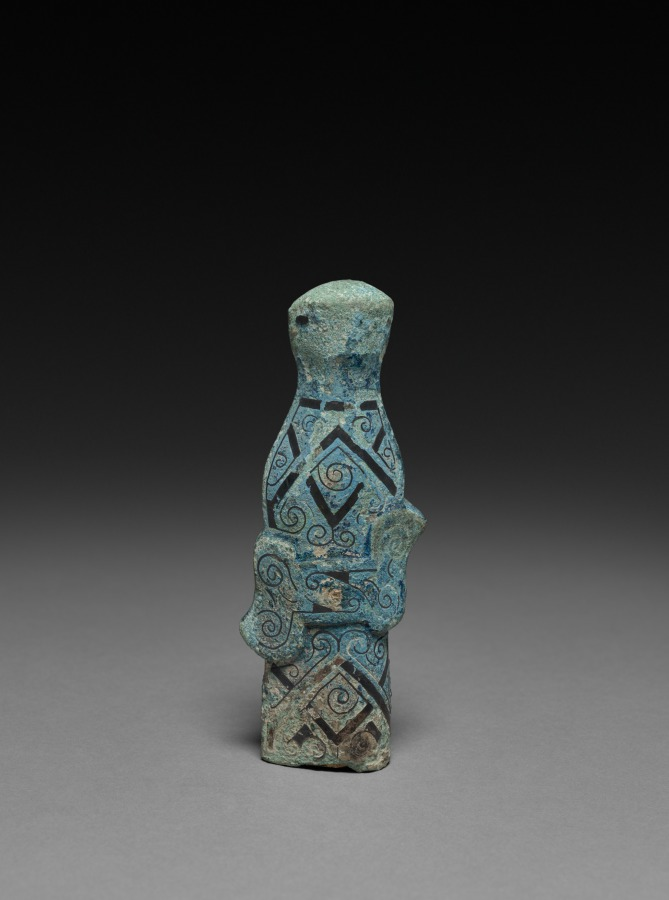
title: Halberd Standard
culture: China, Zhou dynasty (c. 1046–256 BCE)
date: c. 600–221 BCE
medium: bronze inlaid with silver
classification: Metalwork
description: This finial, being pear-shaped in section, is known to have been the handle of a halberd. Its ornament consists of broad bands intersecting to make angles, and of delicate lines ending in whorls. The asymmetrical part through the middle is derived from a bird, its head being at the upper right, its tail at the lower left. The whole object is coated with a green and blue patina of rare beauty.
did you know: The craftsman used silver inlay to create an eminently satisfying pattern of dashing straight lines and restless curves.